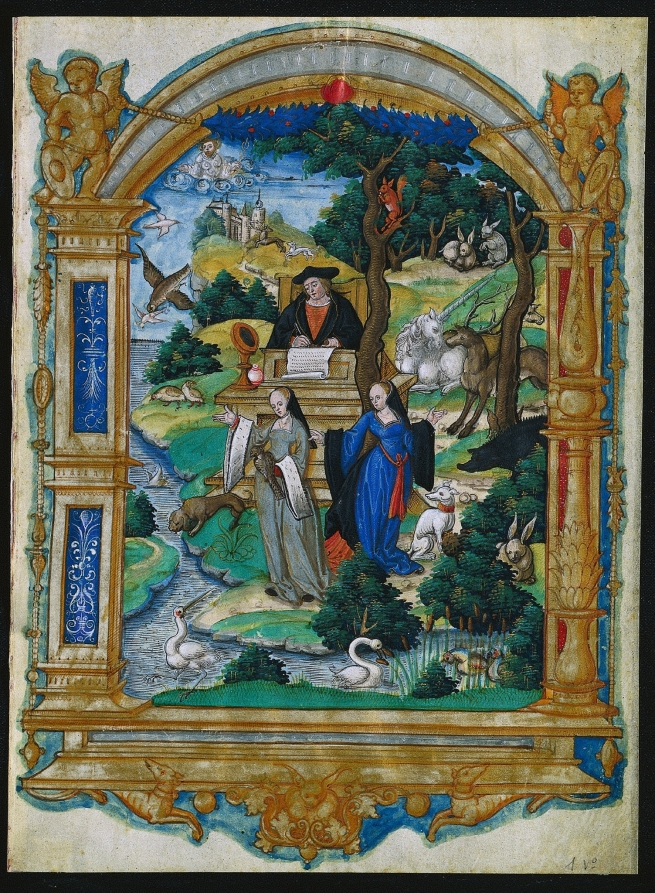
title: Frontispiece Miniature from the Manuscript of a Poem by Guillaume Crétin: Debate Between Two Women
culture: France, Paris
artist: Master of Francis I (French)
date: c. 1537–1540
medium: ink, tempera, and liquid gold on vellum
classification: Manuscript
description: This leaf is one of four surviving miniatures from the only known illuminated manuscript of the poem Débat entre deux dames sur le passetemps des chiens et oyseaux by Guillaume Crétin. The poem takes the form of a debate between two women, represented here, who argue at length as to the relative merits of hunting with falcons versus hunting with dogs. The volume was likely made as a presentation copy or gift for King Francis I (1515-1547). This artist is known to have painted many miniatures for the king as well as for other members of the court during the 1530s.